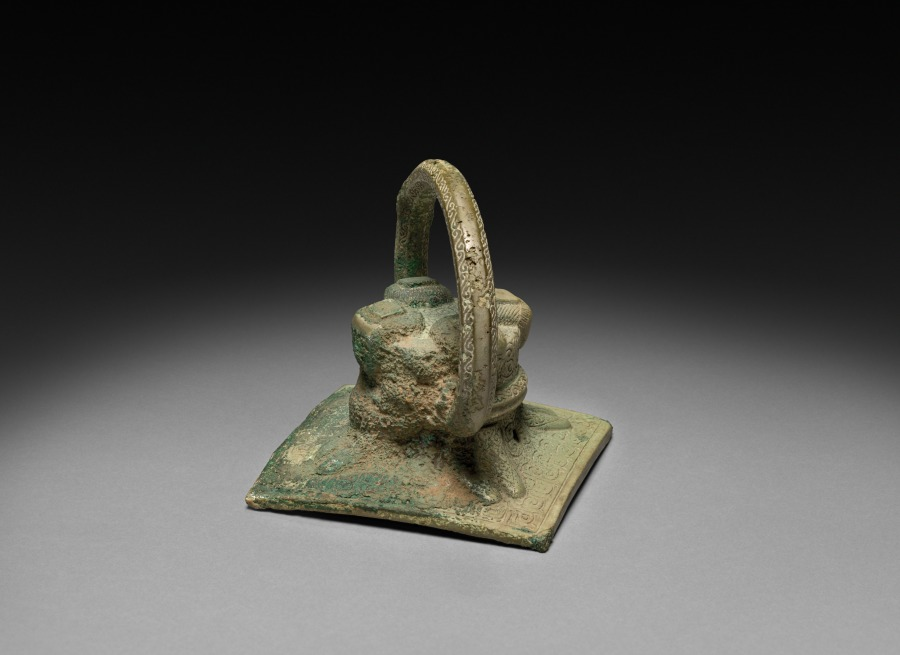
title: Handle of a Jiangu Drum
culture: China, Zhou dynasty (c. 1046–256 BCE), Spring and Autumn period (770–475 BCE)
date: c. 770–475 BCE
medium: bronze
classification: Metalwork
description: The most remarkable feature of this object is the four kneeling figures with ornamented bodies; Han dynasty sources mention cut hair and tattooing as a custom among the local Yue people. This bronze work served as a handle and top ornament of a large, barreled drum called jiangu (建鼓), supposedly made of lacquer and alligator skin. Two comparable handles from tombs dated to the Spring and Autumn period in Jiangsu and Anhui provinces were found amid musical instruments. The handle allows the drum to be suspended and played from the sides.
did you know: The square stud on the head of each figure may represent a bun.